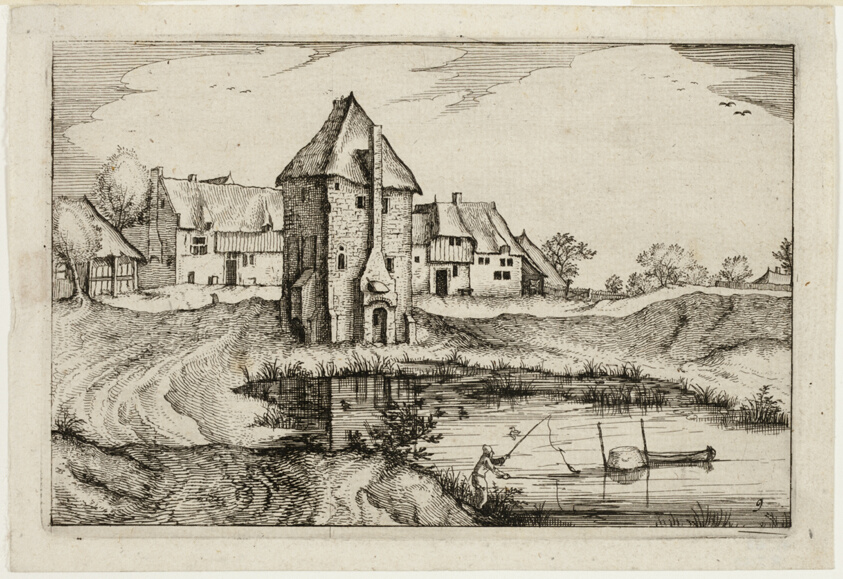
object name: Print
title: The Pond, plate nine after Pictures of Farms, Country Houses and Rustic Villages (Praediorum villarum et rusticarum casularum icones)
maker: Claes Jansz. Visscher (Dutch, 1587-1652); after Unknown Flemish Artist, misidentified as Pieter Bruegel, the elder (Flemish, 1525/30-1569)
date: 1612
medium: Etching in black on ivory laid paper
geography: Flanders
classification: etching; print; prints and drawing